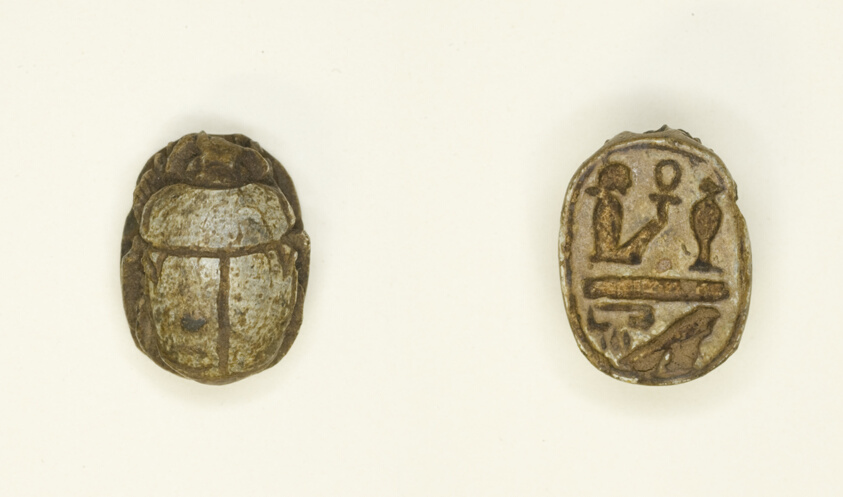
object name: Costume and Accessories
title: Scarab: Wish Formula (?)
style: egyptian, ancient, late period (egyptian), new kingdom, third intermediate period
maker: Egyptian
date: New Kingdom–Late Period, Dynasties 18–26 (about 1550–525 BCE)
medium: Steatite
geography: Egypt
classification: scarab; ancient art; costume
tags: Hieroglyphs, falcons, insects, vessels